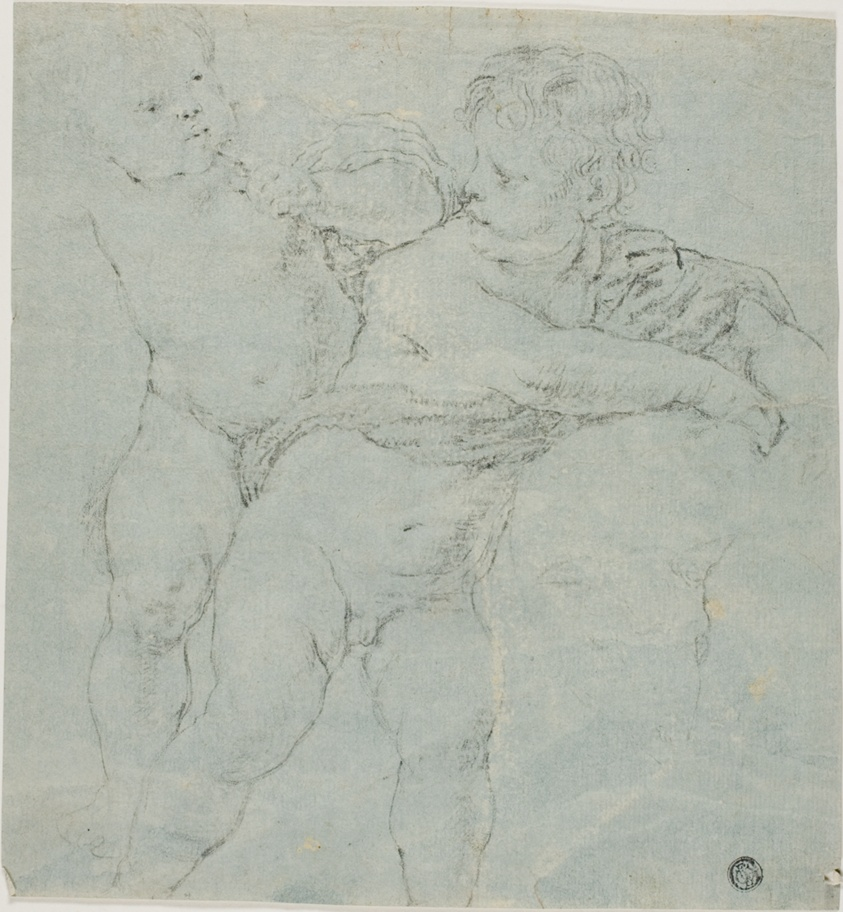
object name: Drawing and Watercolor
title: Two Putti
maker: Peter Cornelius (German, 1783-1867)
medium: Black crayon, on cream laid paper, prepared with a blue wash ground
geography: Germany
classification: chalk; drawings (visual works); prints and drawing